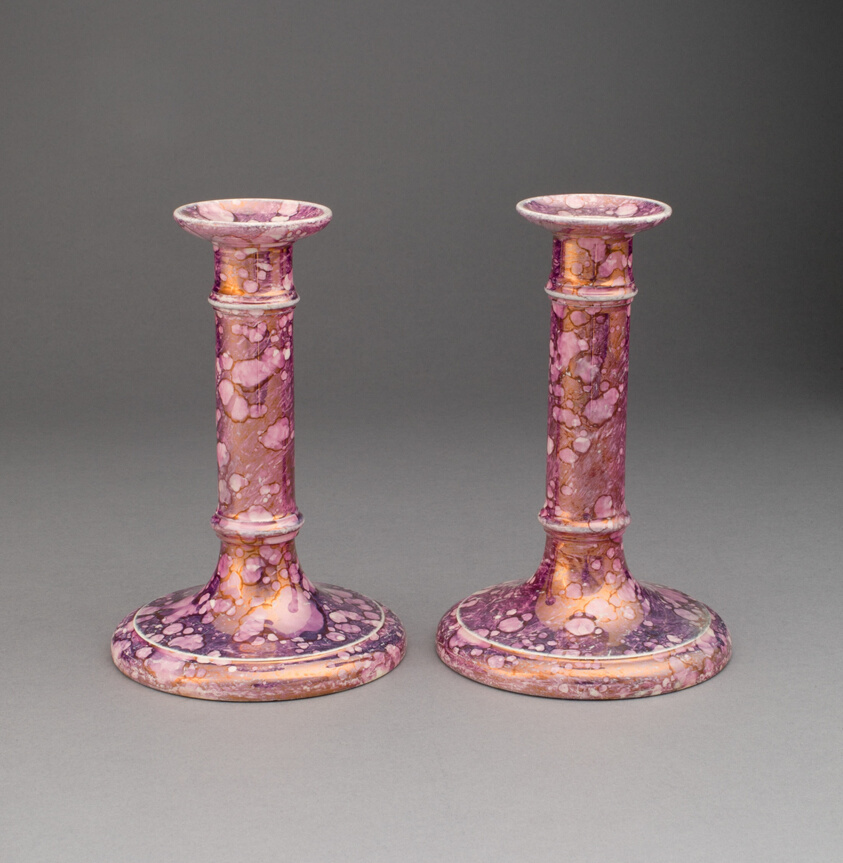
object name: Ceramics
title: Candlestick (one of a pair)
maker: England, Sunderland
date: 1810/20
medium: Lead-glazed earthenware with lustre decoration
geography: Sunderland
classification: candleholder - candlestick; candleholder; ceramics; european decorative arts; earthenware